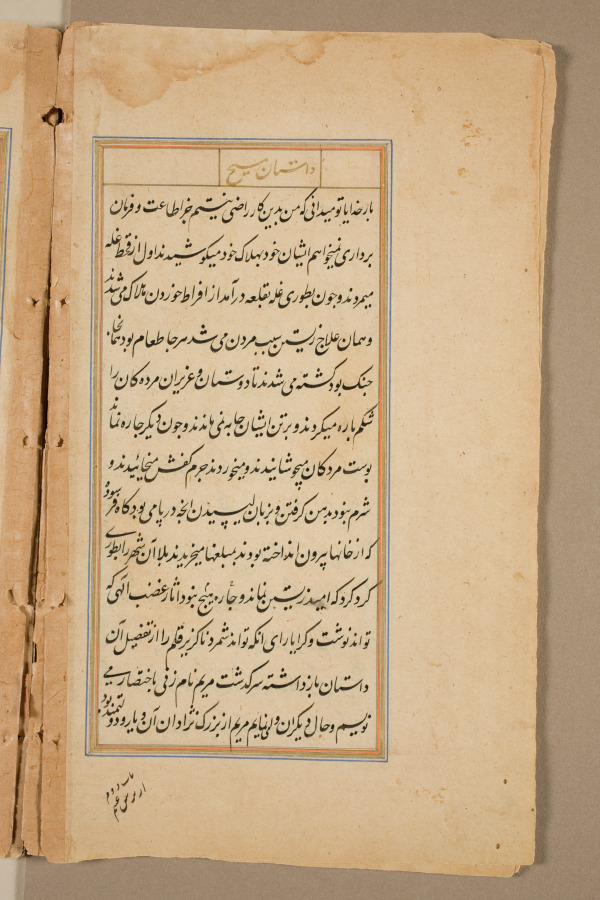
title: Text page from a Mirror of Holiness (Mir’at al-quds) of Father Jerome Xavier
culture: Mughal India, Allahabad, made for Prince Salim (1569–1627)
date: 1602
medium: Ink and gold on paper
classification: Manuscript